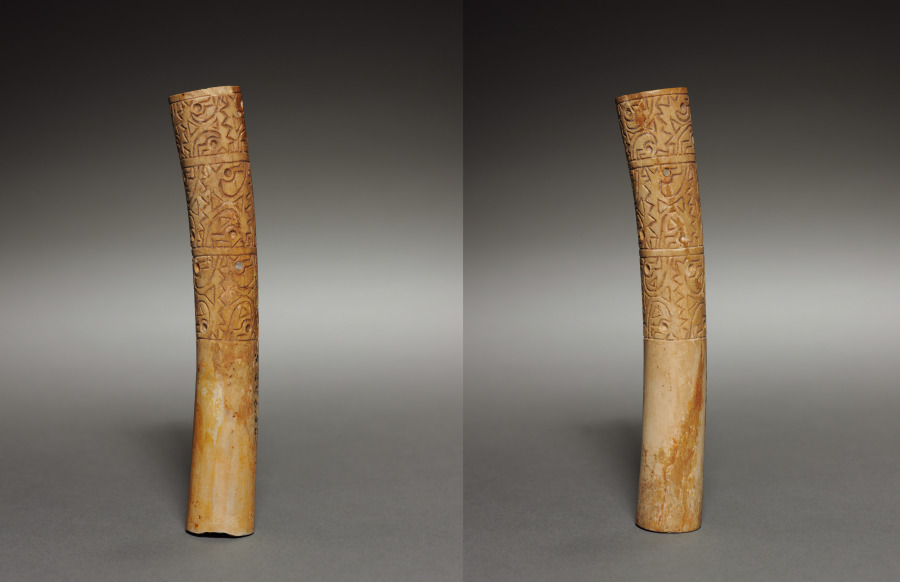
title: Pair of Ear Ornaments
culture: Peru, Moche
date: 200–550 CE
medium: incised bone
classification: Jewelry